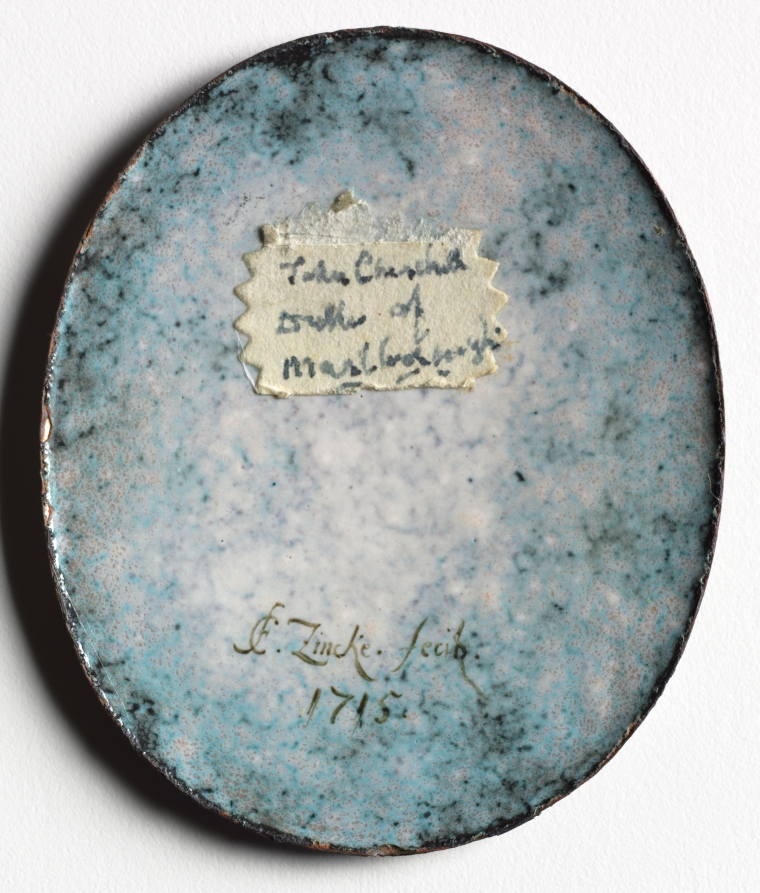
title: Portrait of John Churchill, 1st Duke of Marlborough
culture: England, 18th century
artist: Christian Friedrich Zincke (German, 1683/85–1767)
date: 1715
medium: enamel on copper in a gilt metal frame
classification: Portrait Miniature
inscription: signed on back: CF Zincke fecit/ 1715. [CF in monorgram].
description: Unlike fragile portrait miniatures painted in watercolor on vellum or ivory, which are prone to cracking, fading, and flaking, enamels are resilient, impervious to the effects of light, and retain their striking original colors over time. Partly for this reason enamel was considered ideal for reproducing famous paintings and treasured portraits in a reduced and luminous form. The complicated and labor-intensive process of enameling required the artist to fire numerous layers of colored metal oxide at different temperatures, which made it difficult to produce a faithful portrait likeness, though masters of the medium were able create portraits of remarkable subtlety imbued with the sitter's personality. The heyday of enamel painting was the late 1600s and early 1700s. Among the enamel specialists was Zincke, who worked in England where he was patronized by Queen Anne, King George I, and King George II.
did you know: Although miniatures are often regarded as a private art form exchanged between loved ones, the nature of this enamel was likely political.